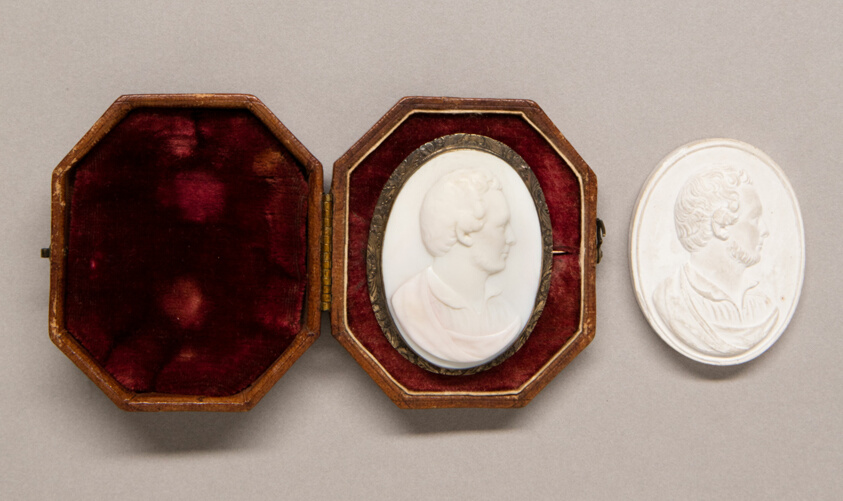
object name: Decorative Arts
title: Cameo of John J. Francis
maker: Erastus Dow Palmer (American, 1817–1904)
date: 1846–49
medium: Plaster and silver gilt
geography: Albany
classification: jewelry; cameo (sculpture); american decorative arts; american arts; decorative arts